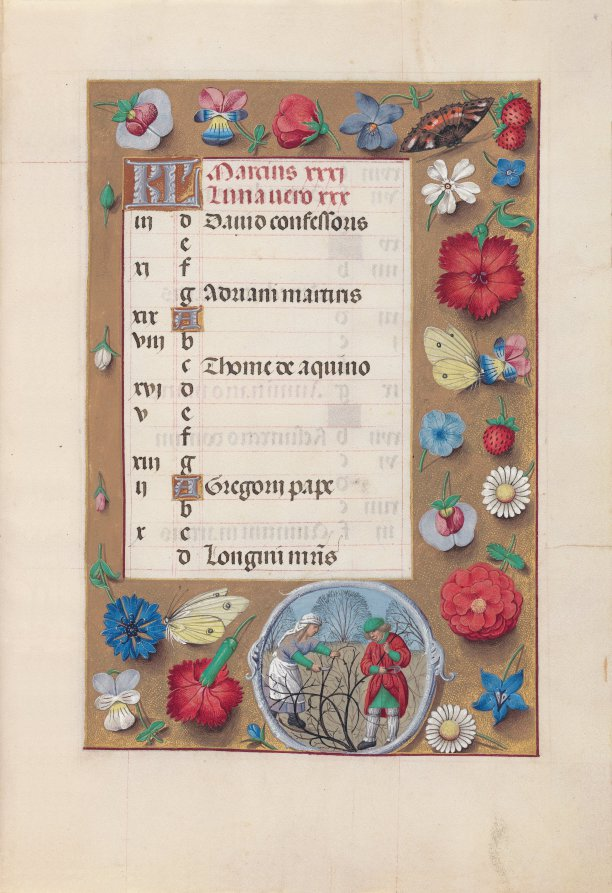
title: Hours of Queen Isabella the Catholic, Queen of Spain: Fol. 4r, March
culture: Flanders, Ghent and Bruges, late 15th century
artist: Master of the First Prayerbook of Maximillian (Flemish, c. 1444–1519)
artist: and Associates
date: c. 1500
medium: ink, tempera, and gold on vellum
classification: Bound Volume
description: This manuscript was illuminated by a circle of at least five highly organized manuscript painters active in the Flemish cities of Ghent and Bruges. The principal illuminator was Alexander Bening, who painted the majority of the book's miniatures. Manuscripts produced by this circle of artists are renowned for the decoration of their borders, which typically feature a rich variety of realistically painted flowers, birds, and butterflies. This prayer book, called a book of hours, was intended not for a cleric but for the private devotions of a lay person—in this case, Isabella the Catholic, Queen of Spain (1451–1504); her coat of arms embellishes the book's frontispiece. It is unlikely that the book was commissioned by the Queen herself; rather, she probably received it as a diplomatic gift from someone courting her patronage, perhaps Cardinal Francisco Jimenez de Cisneros. A Franciscan friar, Jimenez was dependent upon Isabella for his advancement, first to the post of Queen's confessor in 1492, and then to Archbishop of Toledo in 1495.